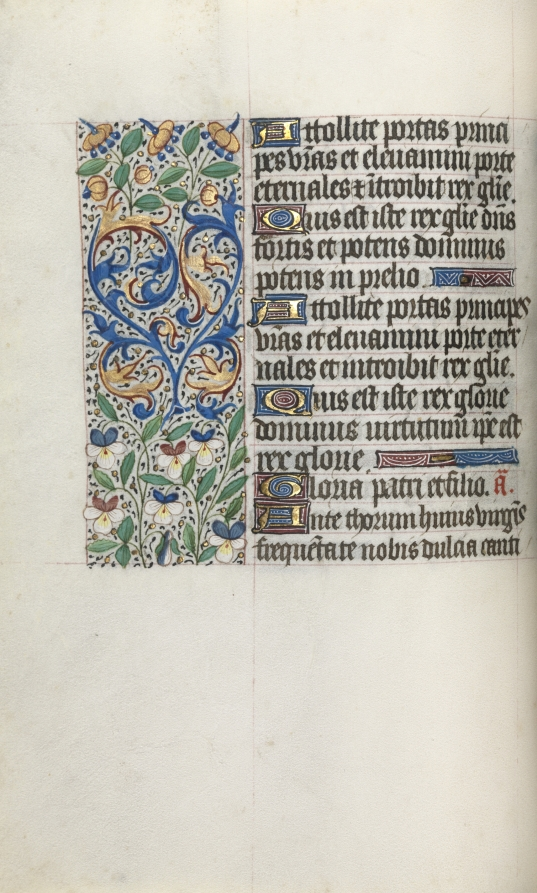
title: Book of Hours (Use of Rouen): fol. 34v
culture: France, Rouen, 15th century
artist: Master of the Geneva Latini (French, active Rouen, 1460–80)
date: c. 1470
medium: ink, tempera, and gold on vellum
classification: Bound Volume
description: In the late 1400s and early 1500s Rouen was an established and important center of book production. The city’s cathedral had a wealthy chapter that spent large sums of money to commission books and to maintain its extensive library. The stationers and booksellers would have likely been concentrated in or near the cathedral precinct. This artist, named after a manuscript now in Geneva, was Rouen’s principal illuminator during the second half of the 1400s.